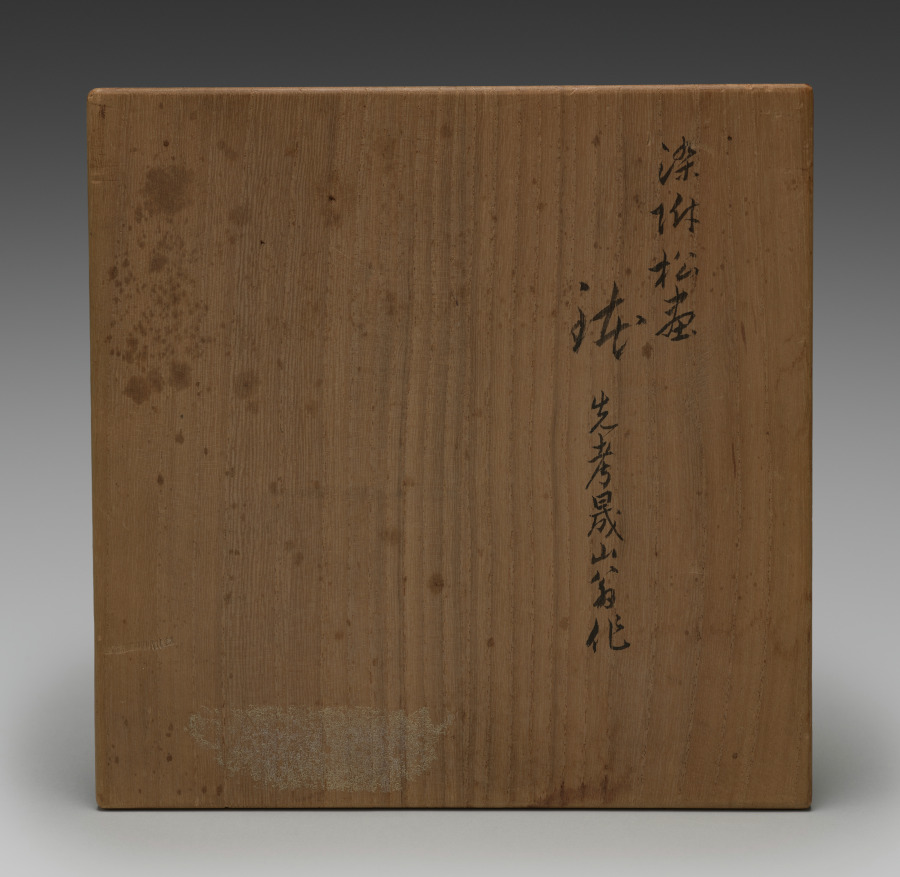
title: Bowl with Pines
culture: Japan, Meiji period (1868–1912)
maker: Seifū Yohei III (Japanese, 1851–1914)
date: 1893–1914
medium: porcelain with underglaze blue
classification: Ceramic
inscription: Inscription by Seifū Yohei IV on the box states that the bowl is the work of Yohei III.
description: The bowl has slightly more detailed surface designs painted in blue under the glaze than some other Yohei III's other teaware, like the Water Cooler with Pines, CMA 2022.163. The three pines, with two, three, and four racks of boughs respectively, have more angular rather than curved trunks, with clearly articulated bark.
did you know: The box for the bowl carries an attestation by Yohei IV that it is the work of his predecessor.